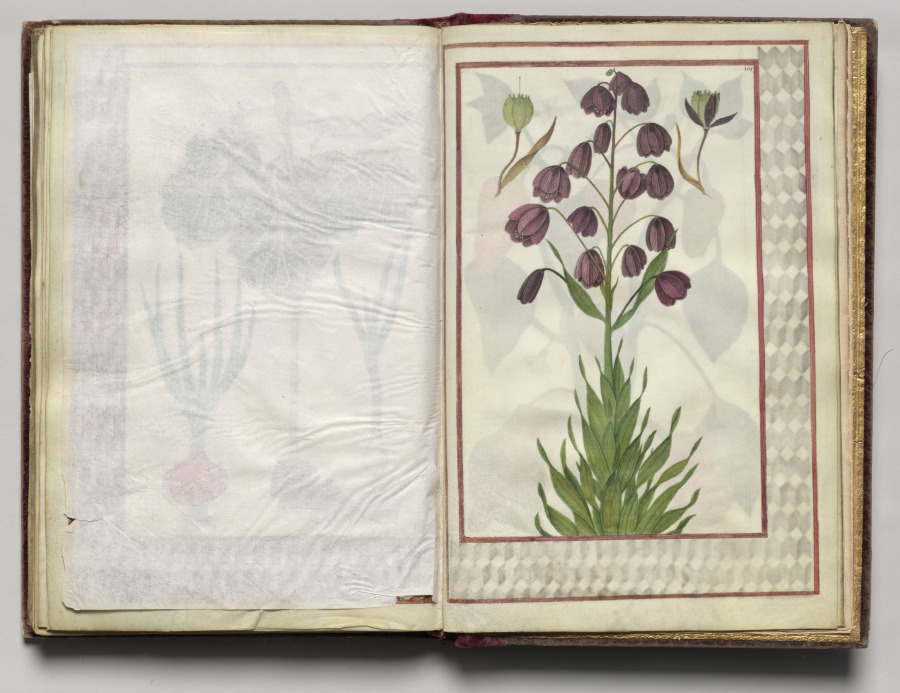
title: Fritillaria Presica with Geometric Border, folio 46 (recto), from Florilegium (A Book of Flower Studies)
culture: France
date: 1608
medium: watercolor, ink, silver, and gold over occasional traces of pencil, on vellum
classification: Bound Volume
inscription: Dated: Poitiers 1608 (on frontispiece) Signed: On frontispiece in black ink, lower right: Van Kuyk Notation on drawing: Frontispiece: in pencil, lower margin: * élève de Van Kessel, peintre flammand (* in pencil also appears in front of Van Kuyk's name).